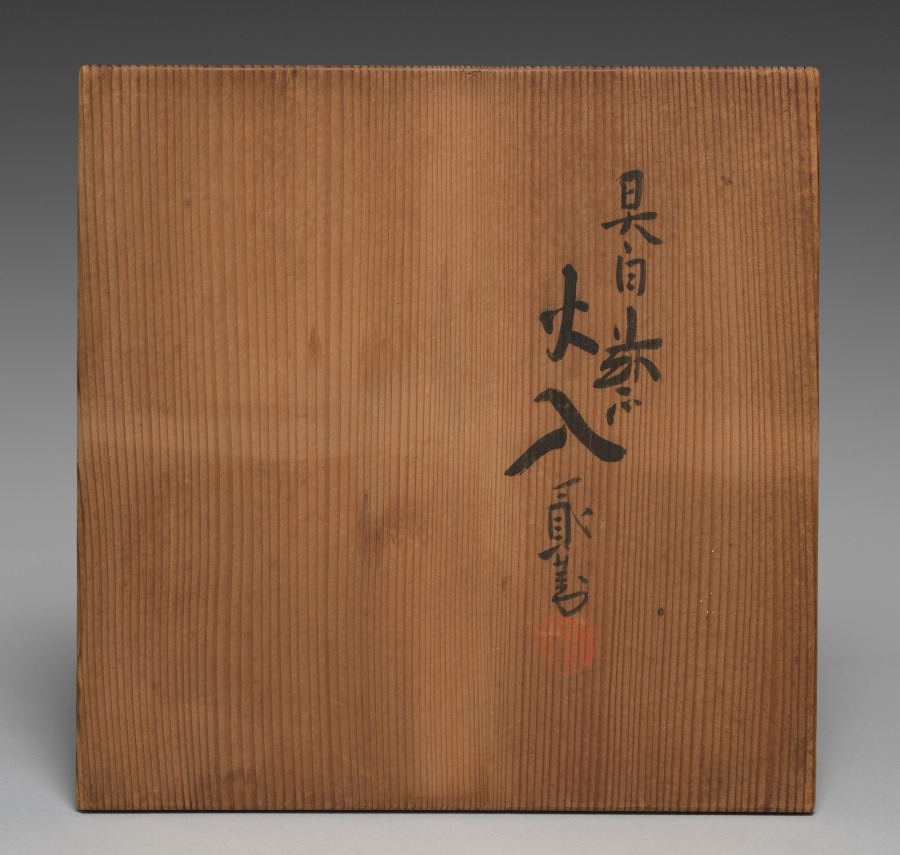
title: Lit Charcoal and Ash Containers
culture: Japan, Meiji period (1868–1912)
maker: Seifū Yohei III (Japanese, 1851–1914)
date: 1893–1914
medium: Set of four containers; porcelain with molded design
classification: Ceramic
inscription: 清風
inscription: The storage box for this set is inscribed and impressed with seals.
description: The box lid for these six-lobed lit charcoal and ash containers, or hiire, identifies them as kōhakuji, another of Yohei III’s translucent cream colors over ivory clay bodies. One might translate the name as “lustrous pearl[–glazed ivory] porcelain.” A hiire was filled with ash with burnt coals at the center so that embers and tobacco ash could be discarded safely during a gathering. Each of the lobes on the containers has a round protrusion set below the rim. The studlike pattern is called ruiza. The term is also used to describe the pattern that rings the shoulder of some flower vases or metal kettles used in chanoyu.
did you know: The Seifu studio generally followed the standard practice in Japan for identifying the artist and object in box inscriptions.